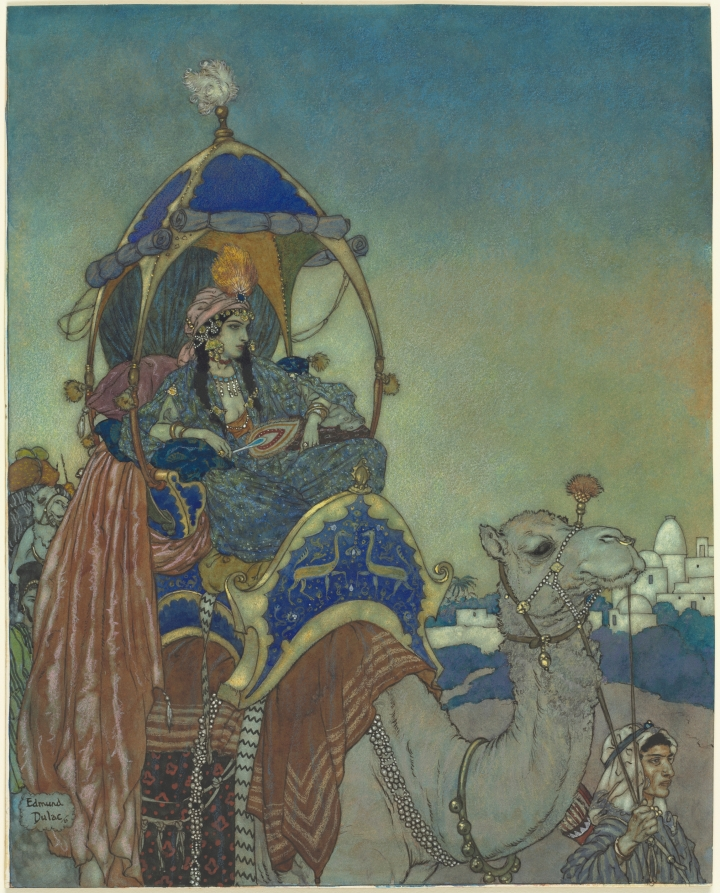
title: The Queen of Sheba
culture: England, 20th century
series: L’Illustration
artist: Edmund Dulac (British, 1882–1953)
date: 1911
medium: Pen and brown ink, watercolor, and gouache, with graphite and color wax crayon, on artist’s drawing board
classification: Drawing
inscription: signed and dated, in black ink, at lower left: Edmund / Dulac 11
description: A celebrated artist of the golden age of British book illustration, the French-born Edmund Dulac was inspired by Persian miniatures and manuscript illustration. This watercolor was one of a series of four scenes painted to accompany a poem by André Dumas, Figures of the Orient. Dulac depicted legendary enchantresses of the East: Circe, Salome, Scheherazade, and here, the Queen of Sheba. Aloft a camel, the dark-haired beauty languorously surveys the arid landscape as she and her entourage approach the Holy Land. Vibrant silks spill out of the queen’s gold and lapis howdah, a veritable mosaic of texture and pattern.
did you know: Edmund Dulac was such a devoted Anglophile that as a student his contemporaries referred to him as "l'Anglais" (English).